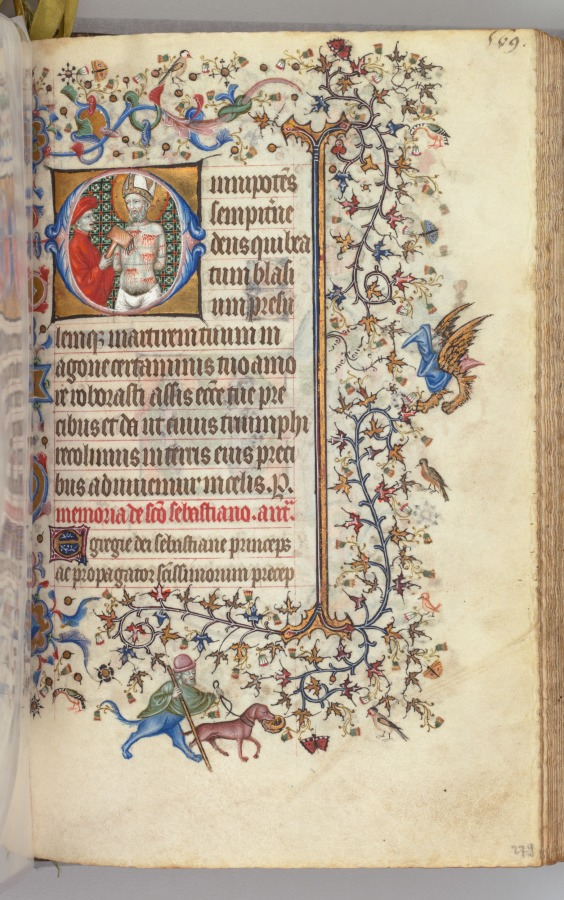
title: Hours of Charles the Noble, King of Navarre (1361-1425): fol. 279r, St. Basins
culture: France, Paris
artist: Master of the Brussels Initials and Associates (French)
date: c. 1405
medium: ink, tempera, and gold on vellum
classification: Bound Volume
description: This precious volume was obviously highly prized by its owner, the French-born King of Navarre, who had his coat of arms painted on no less than twenty folios. Rather than directly commissioning this manuscript from a specific workshop, it seems that Charles the Noble acquired his book of hours -- perhaps ready-made for the luxury market -- while on a trip to Paris in 1404-05. A collaborative effort, six painting styles are evidenced within the pages of this codex, those of two Italians, two Frenchmen, and two Netherlanders. The painter who was responsible for the planning and decoration of the book, and who produced seventeen of the large miniatures, was a Bolognese artist known as the Master of the Brussels Initials. His principal assistant, responsible for most of the borders, was a Florentine who signed his name "Zecho" da Firenze on folio 208 verso.